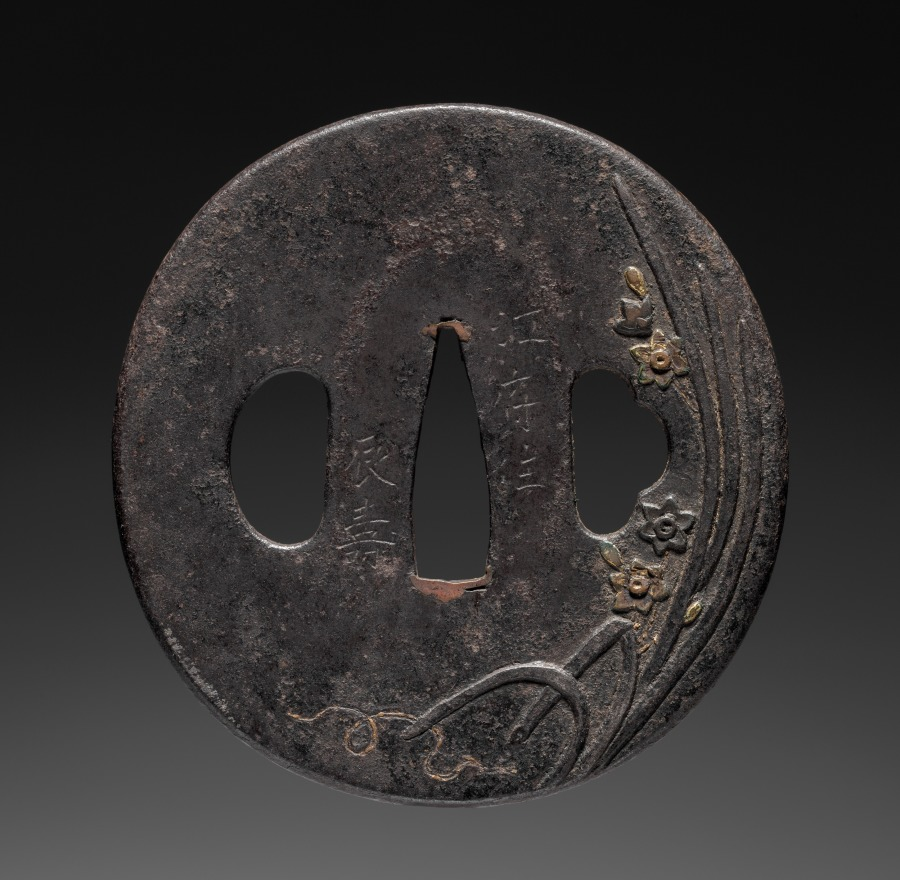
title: Sword Guard (Tsuba)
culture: Japan, possibly Edo period (1615-1868)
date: c. 1615–1868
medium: iron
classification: Arms and Armor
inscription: 銘 江府住 辰壽